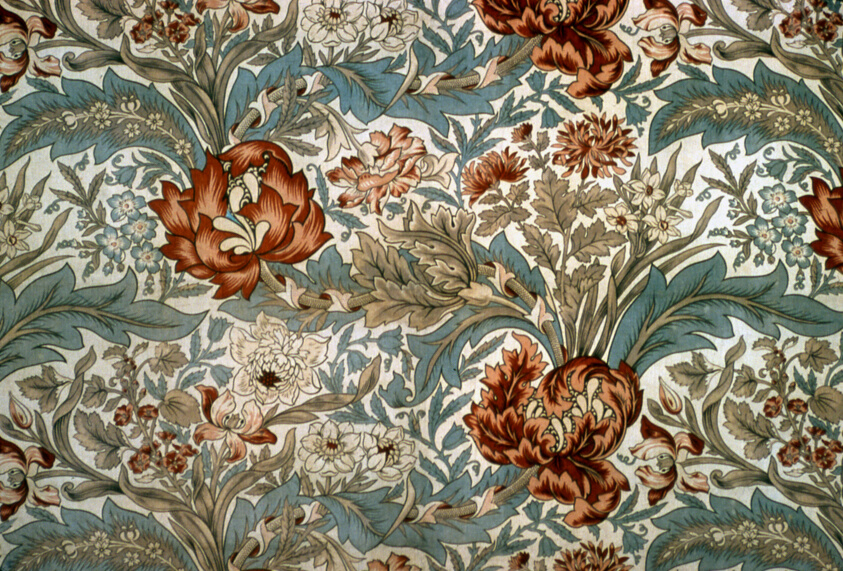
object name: Textile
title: Panel (Formerly a Furnishing Textile)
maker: Designed by Sidney Mawson (English, 1876–1937); Probably produced by Turnbull & Stockdale, founded 1881; England, Ramsbottom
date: c. 1895/1900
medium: Cotton, twill weave with supplementary pile wefts forming cut, solid pile (velveteen); block printed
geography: England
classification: textile; weaving - printed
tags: Chicago